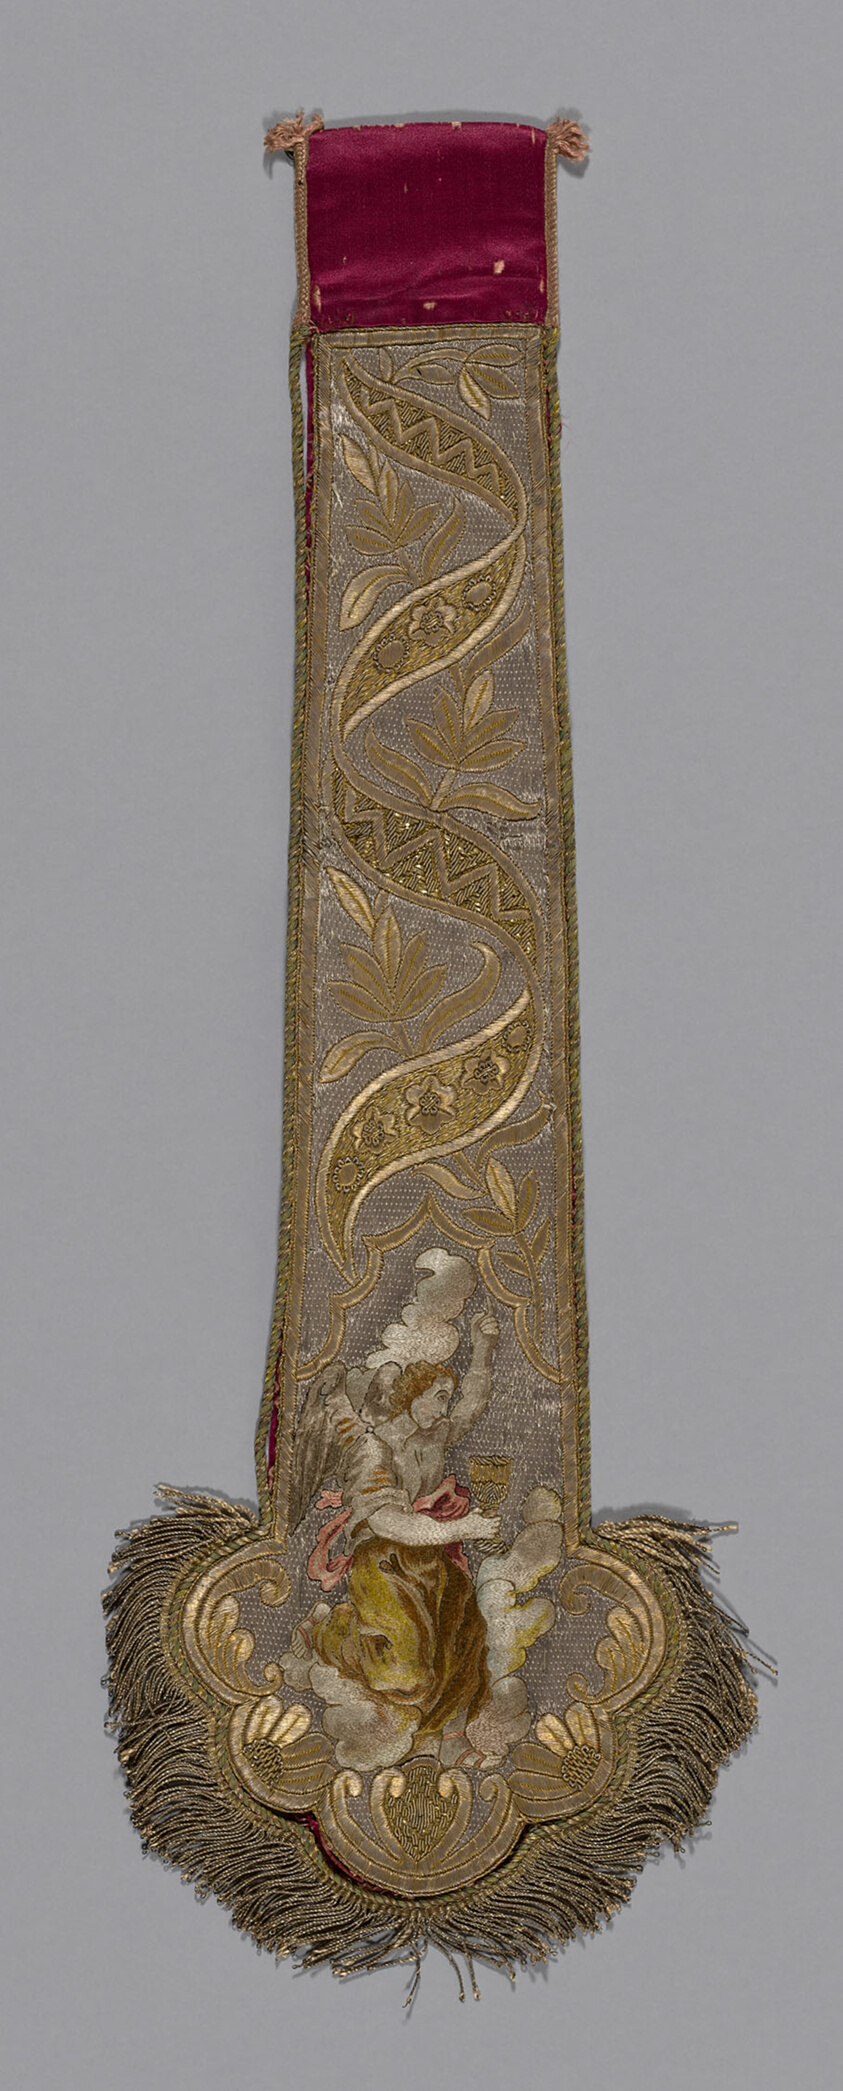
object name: Textile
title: End of a Stole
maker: Italy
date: 19th century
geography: Italy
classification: textile; needlework (visual works)